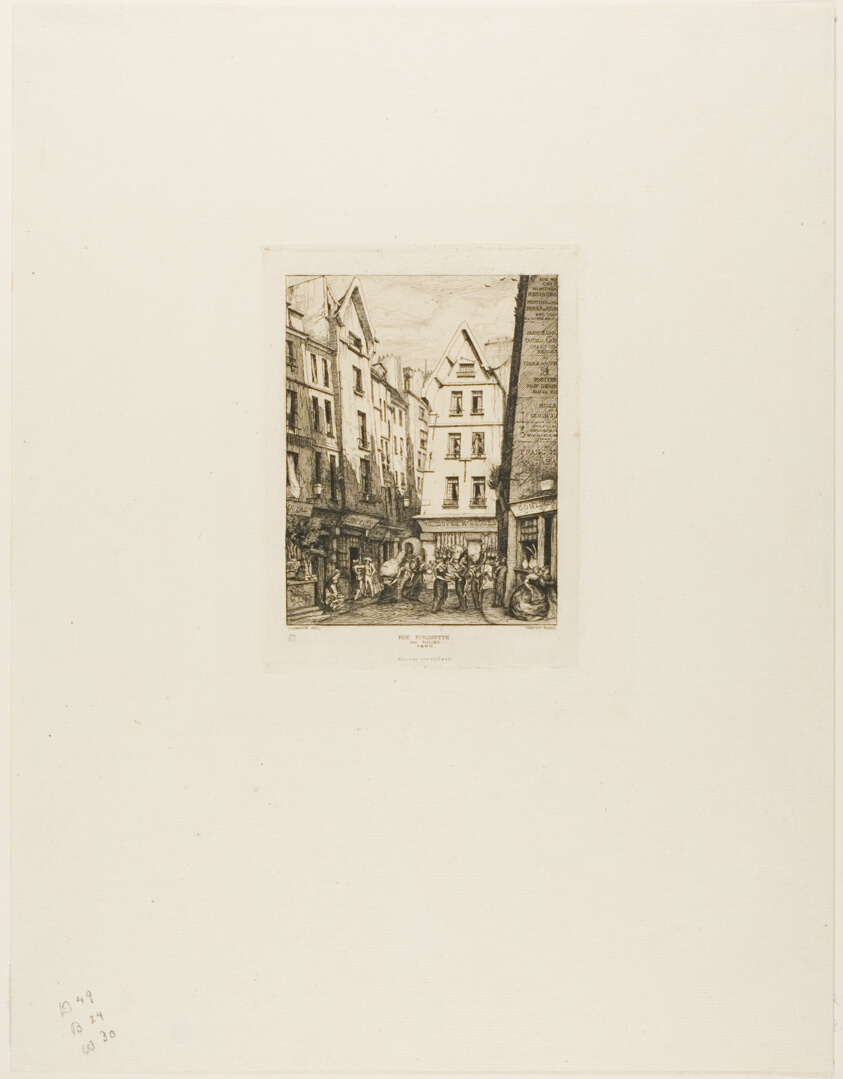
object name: Print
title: Rue Pirouette aux Halles, Paris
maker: Charles Meryon (French, 1821-1868); printed by Auguste Delâtre (French, 1822-1907); after Louis-Marie Laurence (French, 1811-1886)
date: 1860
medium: Etching and drypoint on ivory laid paper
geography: France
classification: etching; print; prints and drawing